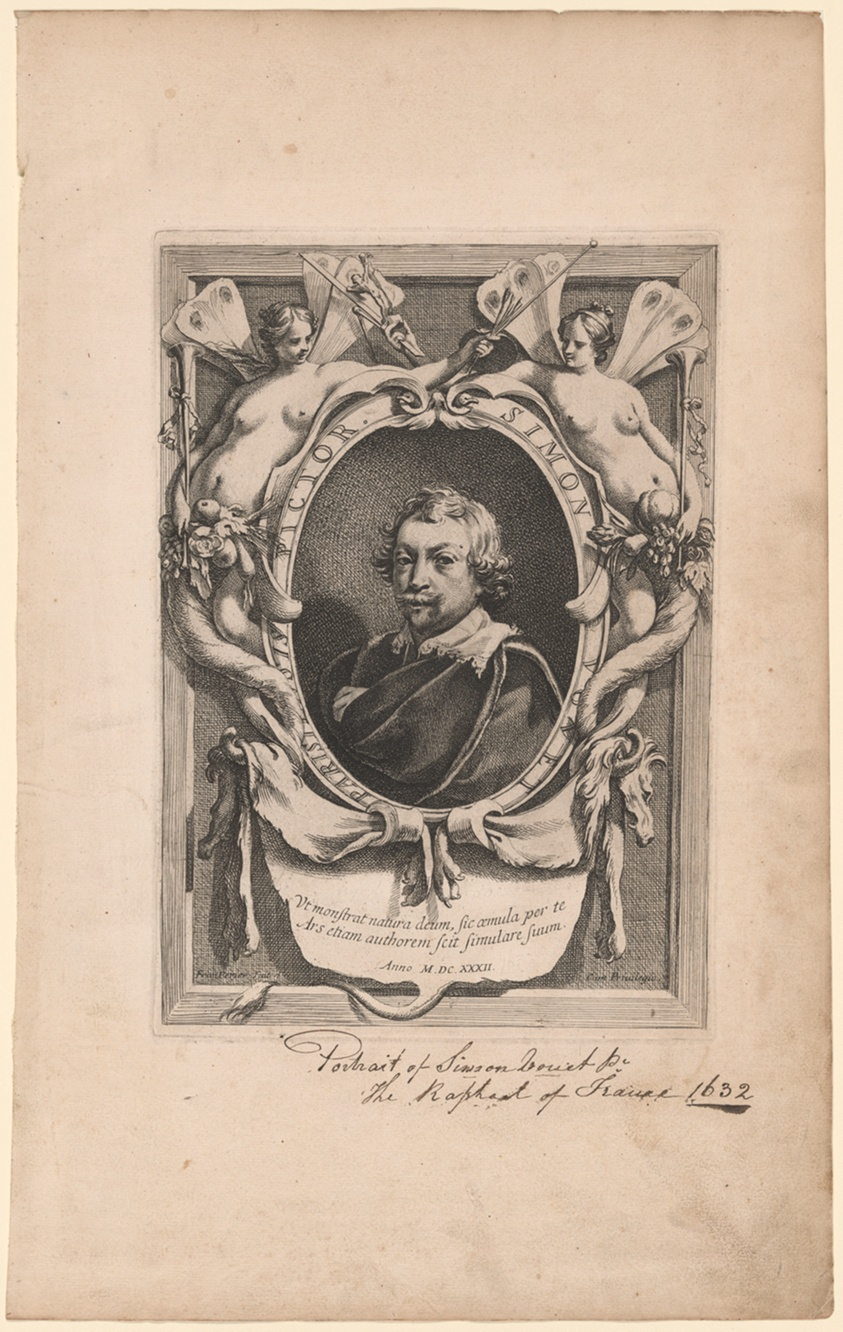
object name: Print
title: Portrait of Simon Vouet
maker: François Perrier (French, 1594-1649)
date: 1632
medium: Etching and engraving in black on cream laid paper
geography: France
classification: prints and drawing; print; engraving; etching; paper